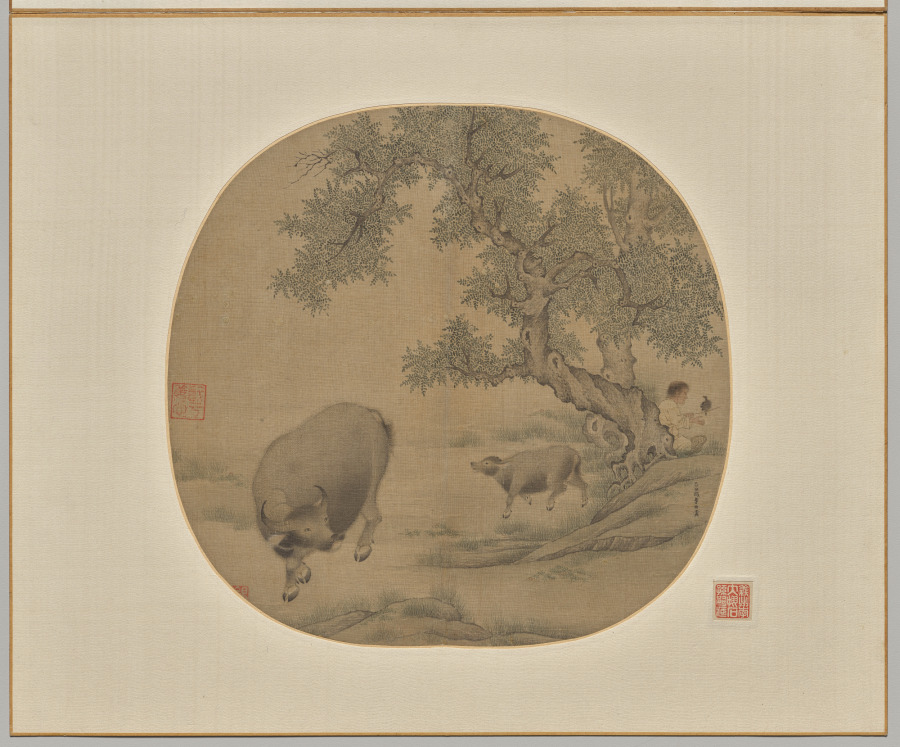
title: Man, Buffalo, and Calf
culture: China, Southern Song dynasty (1127-1279)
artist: Li You (Chinese, active c. 1145)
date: 1145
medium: album leaf; ink and color on silk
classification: Painting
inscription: Artist's inscription: 乙丑歲李祐/椿畫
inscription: 3 seals: 1 of Wu T'ing (c. 1600); 1 of An Kuo (1481–1534); 1 of Li Pao-hsün (1858–1915)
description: Here, a herdboy tending a cow with a calf is sitting beneath a tree with his pet myna bird. The painting can be read as a pastoral scene. As the water buffalo helped plow the fields, it was perceived as an animal that endures hard work without gain for itself, often interpreted as a metaphor for the official. Ox-herding pictures, presented as gifts in court circles, were used for their moral and political rhetoric. The Yijing (Book of Changes) states, The Receptive is the earth, the mother . . . it is a cow with a calf . . . the multitude [in relation to the ruler].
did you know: Li You included such tiny details as circular patterns of hair on the buffalo’s hindquarters.